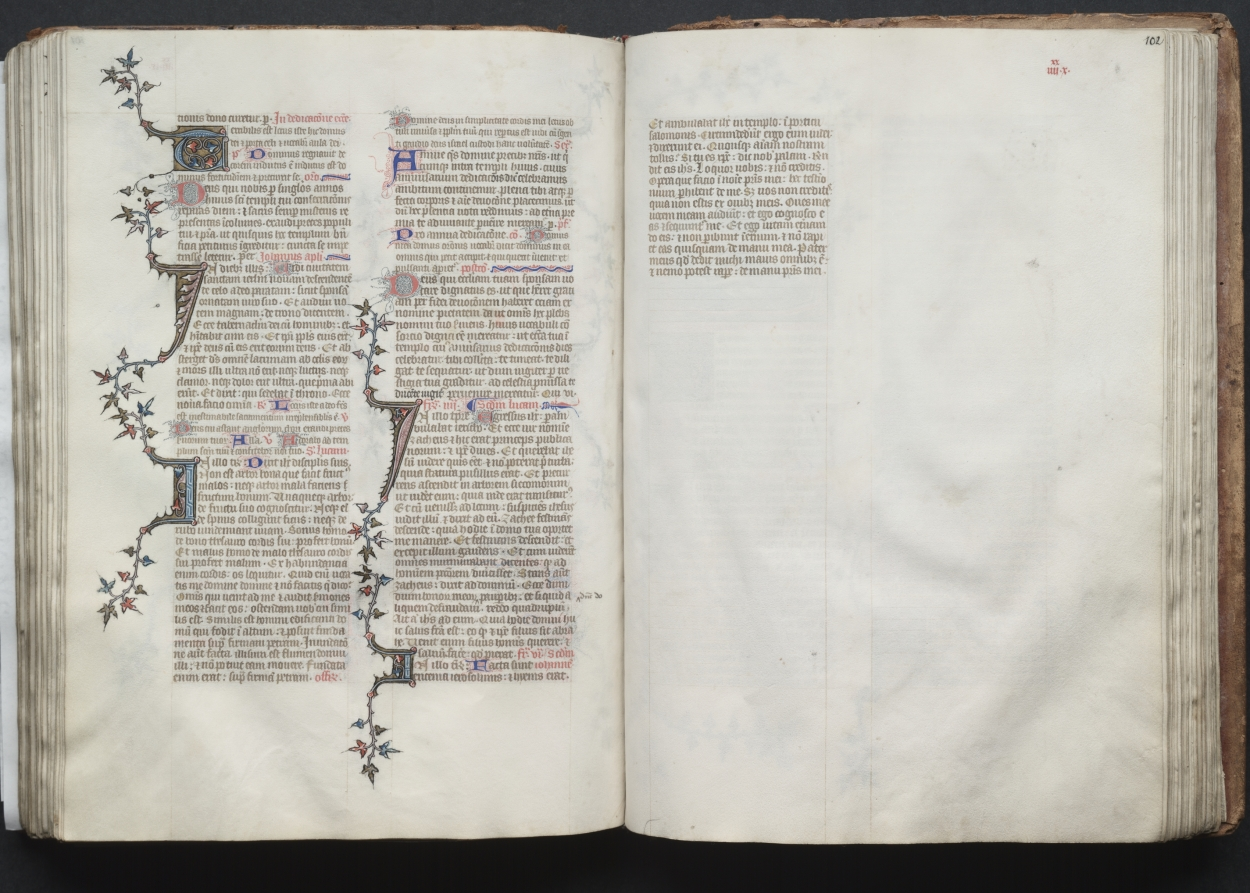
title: The Gotha Missal: Fol. 102r, Text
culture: France, Paris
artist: Master of the Boqueteaux (French)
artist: and Workshop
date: c. 1375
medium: ink, tempera, and gold on vellum; blind-tooled leather binding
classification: Bound Volume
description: The style and quality of this manuscript's decoration is typical of deluxe Parisian books made for aristocratic or royal patrons. Most of the book's decoration appears to be the work of the Master of the Boqueteaux, an artist active at the court of King Charles V (died 1380). His style was apparently shared by a number of book illuminators working in and around Paris. It is very possible that the Gotha Missal belonged to Charles V, but is not provable because the manuscript has no royal portraits and lacks a colophon. Given the book's magnificent decoration, however, it would seem that it was produced for a Valois prince, if not for the king himself. The manuscript receives its name from the German dukes of Gotha, its later owners.